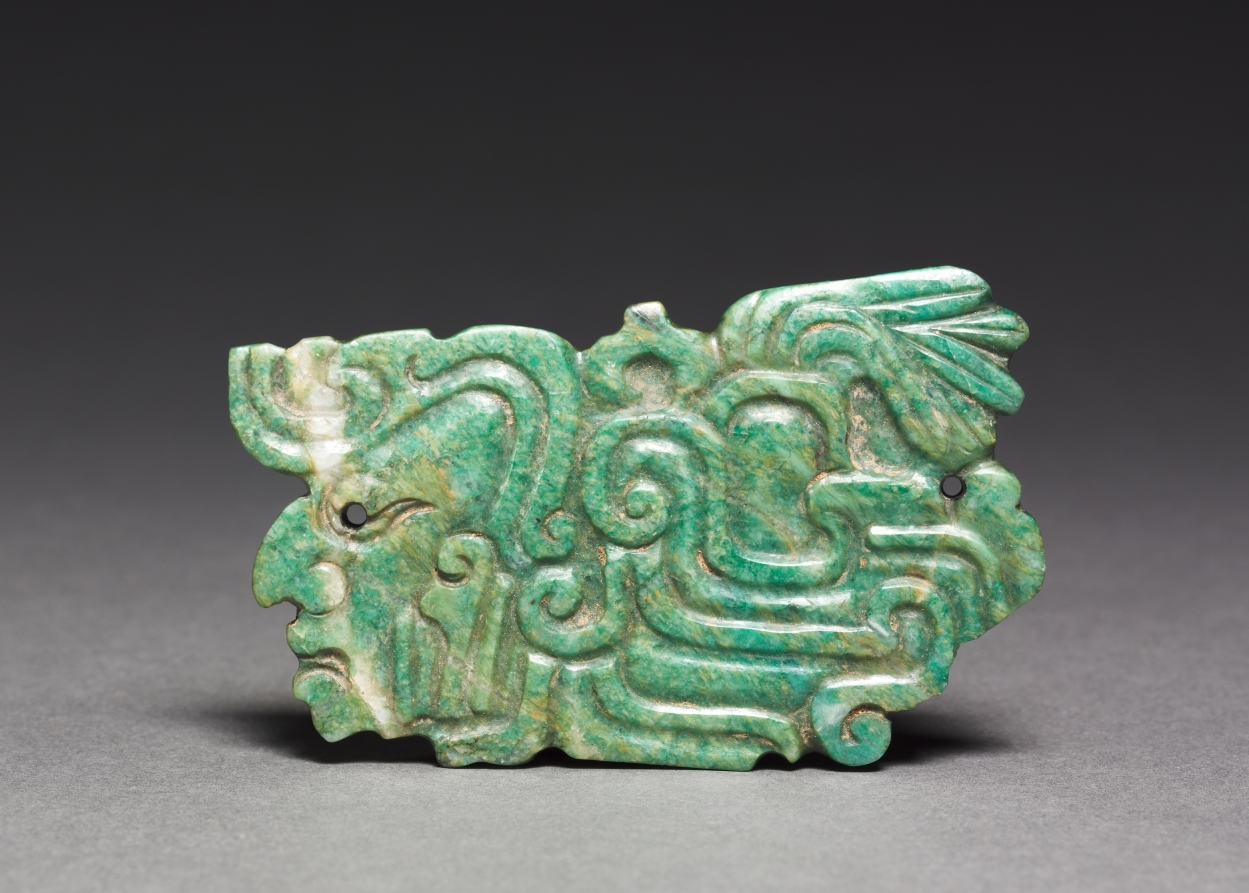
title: Ornament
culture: Mexico or Central America, Maya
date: 250–900 CE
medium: greenstone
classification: Stone